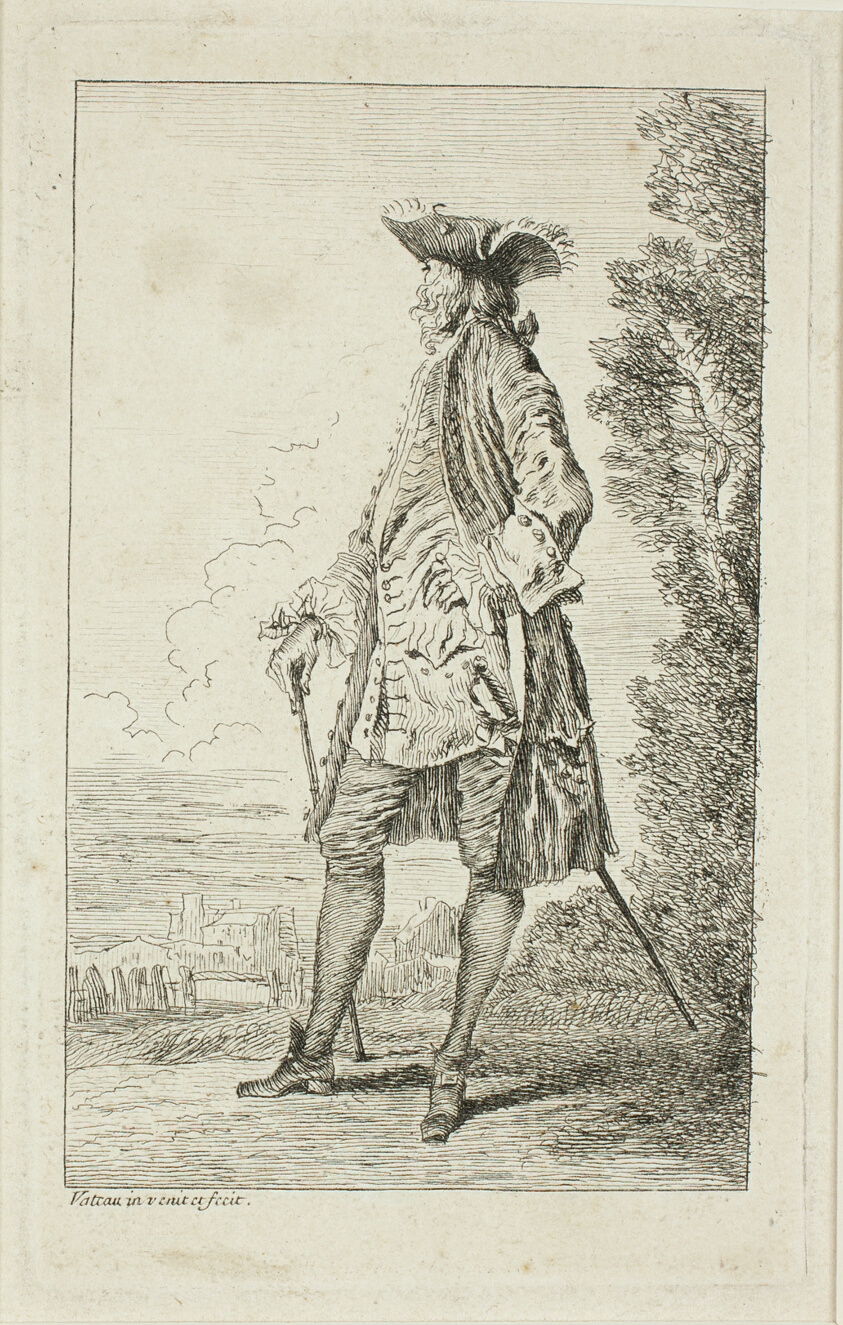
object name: Print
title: Standing Man with a Hat, Facing Left, from Figures de modes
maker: Jean Antoine Watteau (French, 1684-1721)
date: c. 1710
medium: Etching in black on ivory laid paper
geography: France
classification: etching; paper; print; prints and drawing